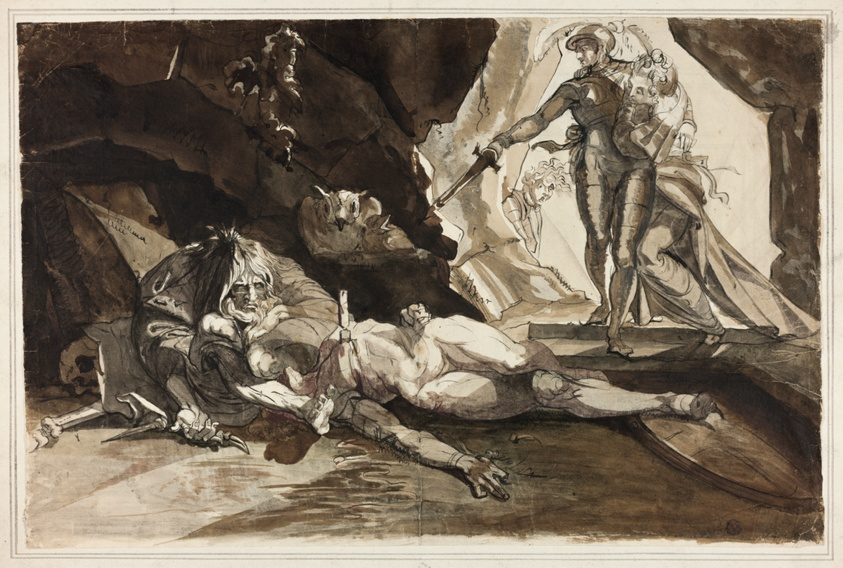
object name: Drawing and Watercolor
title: The Cave of Despair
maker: Henry Fuseli (Swiss, active in England, 1741-1825)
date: c. 1769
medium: Pen and black ink, with brush and brown and gray wash and touches of red gouache, over graphite and touches of charcoal, on ivory laid paper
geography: England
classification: pen and ink drawings; drawings (visual works); prints and drawing; paper